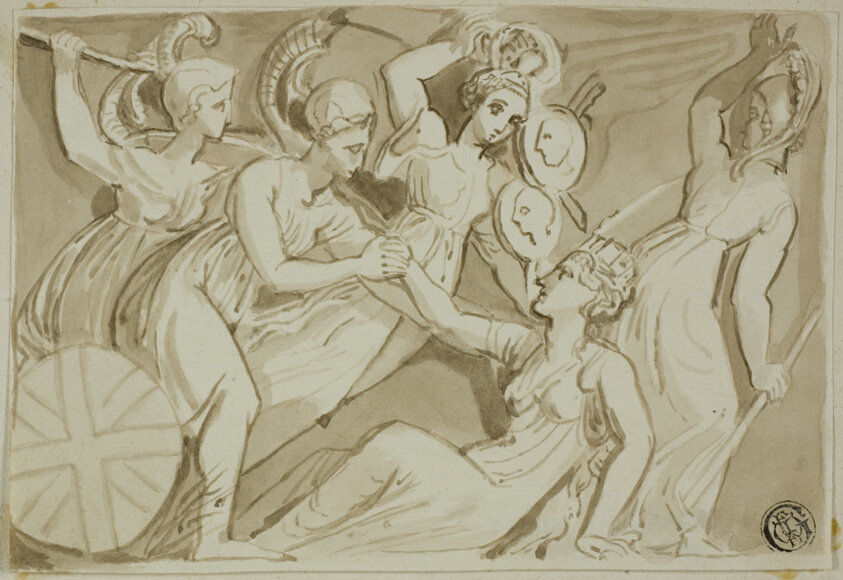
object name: Drawing and Watercolor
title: Female Warriors Coming to the Aid of Britannia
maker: After Thomas Stothard (English, 1755-1834); or William Pitts (English, 1790-1840)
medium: Brush and brown wash, over traces of red chalk, on ivory wove paper, tipped on cream wove paper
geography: England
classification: pen and ink drawings; drawings (visual works); prints and drawing